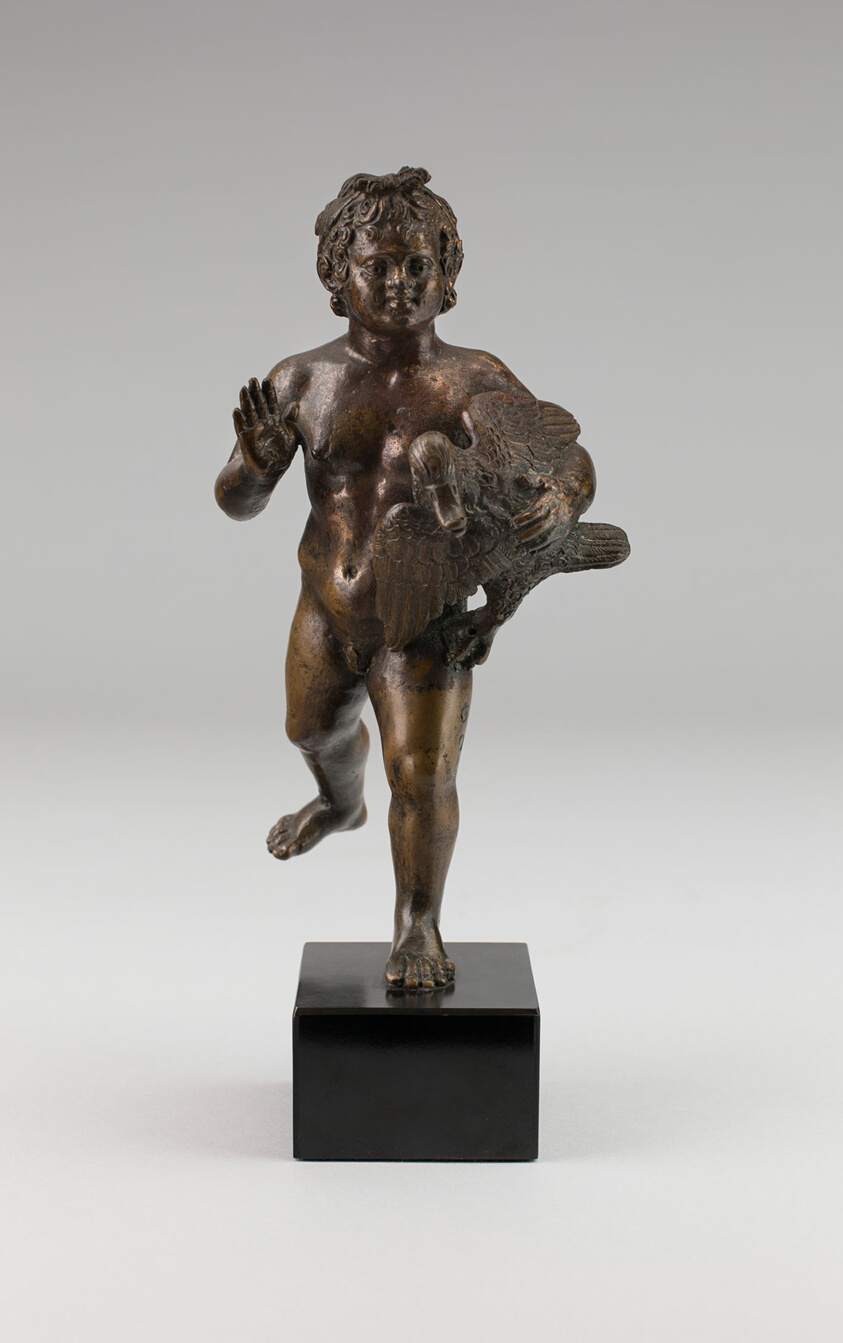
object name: Sculpture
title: Cupid Carrying a Swan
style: sixteenth century, 16th Century, 17th Century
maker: Venetian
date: 1500/1600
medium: Bronze, traces of polychromy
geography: Venice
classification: statuette; sculpture; bronze; Italian; metal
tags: cupids, animals, bird, child, Greek, Greek gods, Greek mythology, mythical, mythological figures, mythology, nudes, swans